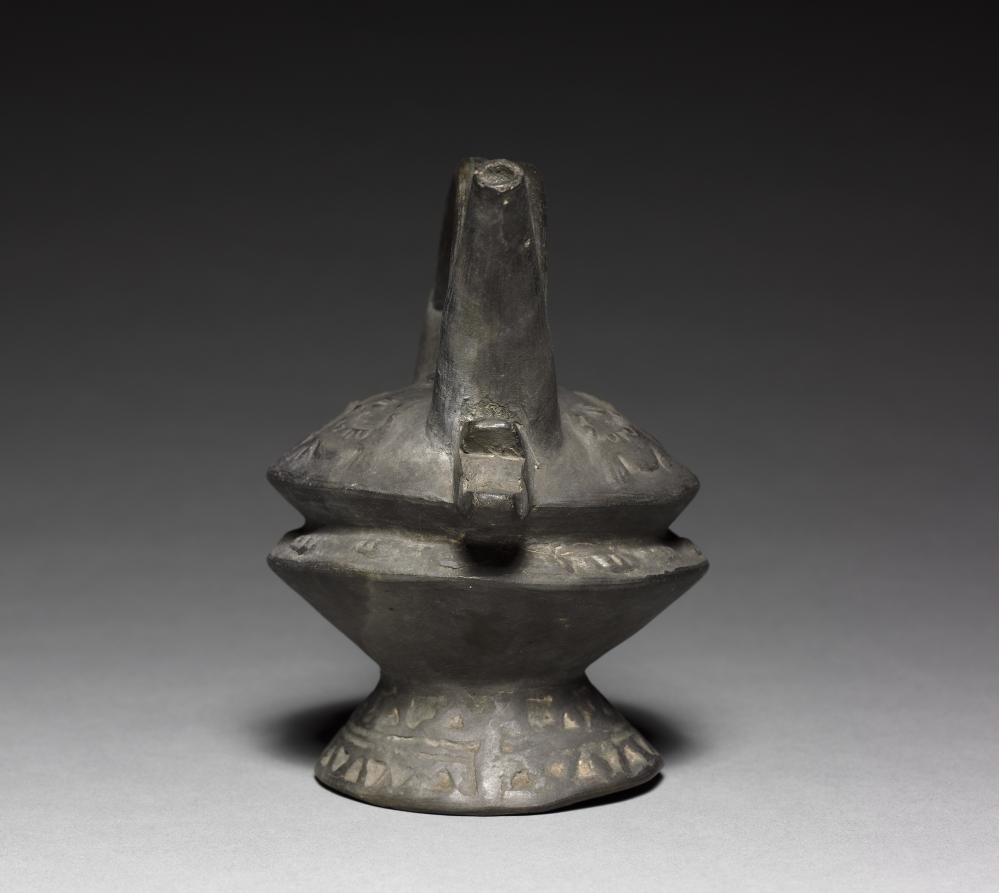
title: Vessel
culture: Peru, Chimú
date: 1300–1400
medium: black ware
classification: Ceramic